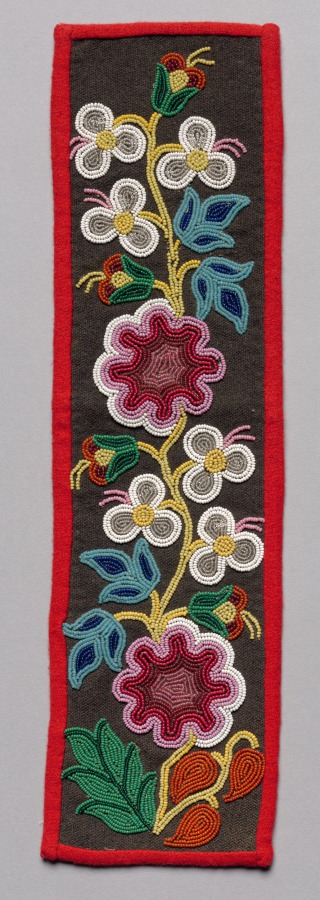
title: Beaded Panel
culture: Northeast Woodlands, Great Lakes Region, Anishinaabe (Ojibwe) or Nehiyawak (Cree) People?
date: late 1800s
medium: glass beads on wool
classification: Textile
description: In the 1800s, native peoples began to use European fabrics to fashion fine formal garments; they favored sturdy cloth, such as velvet and wool broadcloth, which provided support for heavy decorative beadwork that was added by hand. Often the fabric was a dark color, providing dramatic contrast for the multicolored beads. Rather than encrusting the entire garment, beadwork was confined to cuffs, “epaulettes,” bib-like plackets and yokes, rectangular panels sewn to leggings, shirts, and dresses, and the like.